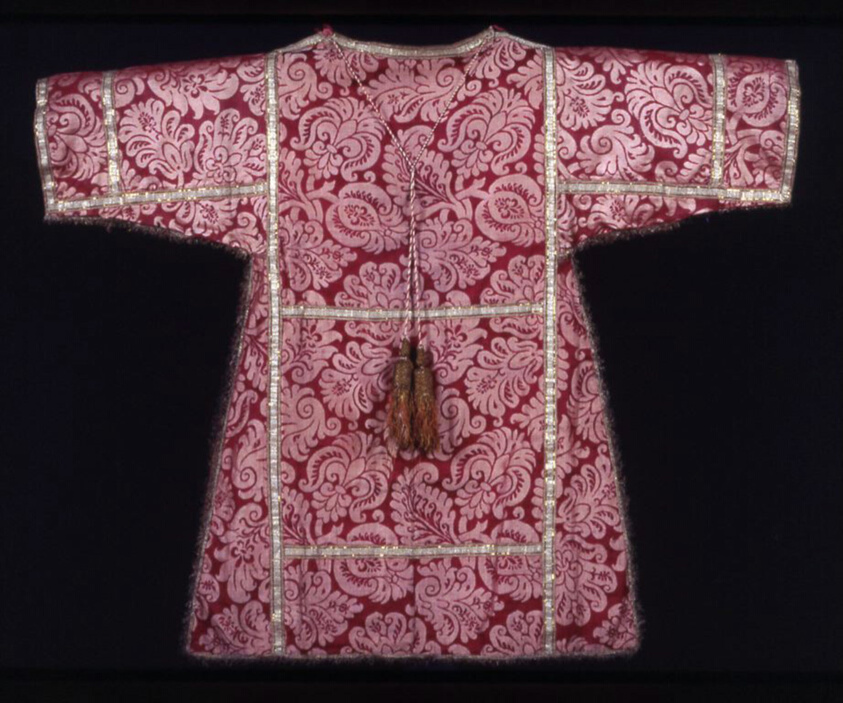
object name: Textile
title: Dalmatic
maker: Probably Italy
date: 1675/1700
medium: Silk, satin damask weave; edged with braid of silk, gilt-metal strips, and gilt-metal-strip-wrapped silk, plain weave with two-color complementary warp weave; and fringe of silk, gilt-metal strips, and gilt-metal-strip-wrapped silk, plain weave with paired warps and extended ground weft fringe; ribbons: silk, plain weave; tassels: silk, linen, and gilt-metal-strip-wrapped silk, oblique interlacing and interknotting (macramé) in flat knots over silk fringe and paper core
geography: Italy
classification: textile; weaving; liturgical